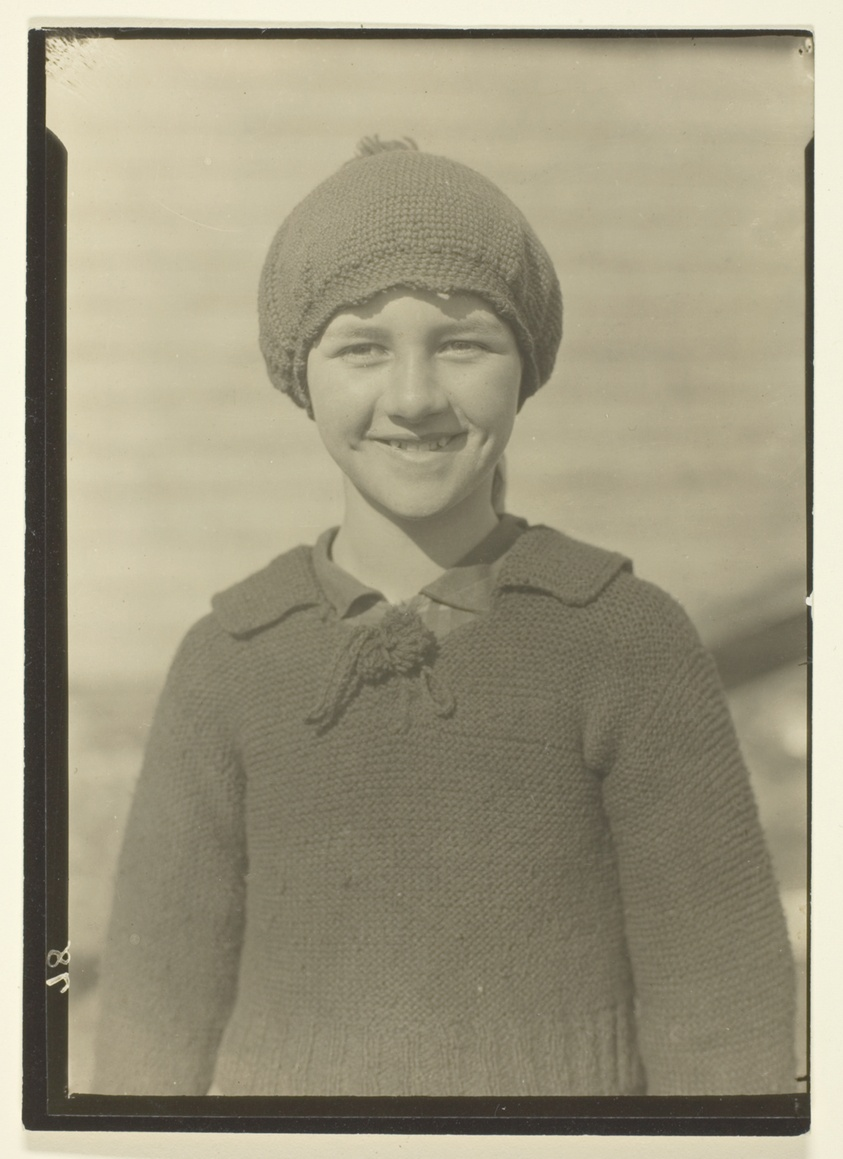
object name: Photograph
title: A Miner's Daughter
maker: Lewis Wickes Hine (American, 1874–1940)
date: 1920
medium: Gelatin silver print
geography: United States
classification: gelatin silver (developing-out-paper) pr; photographic process; photography; photograph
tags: Collected by Hugh Edwards